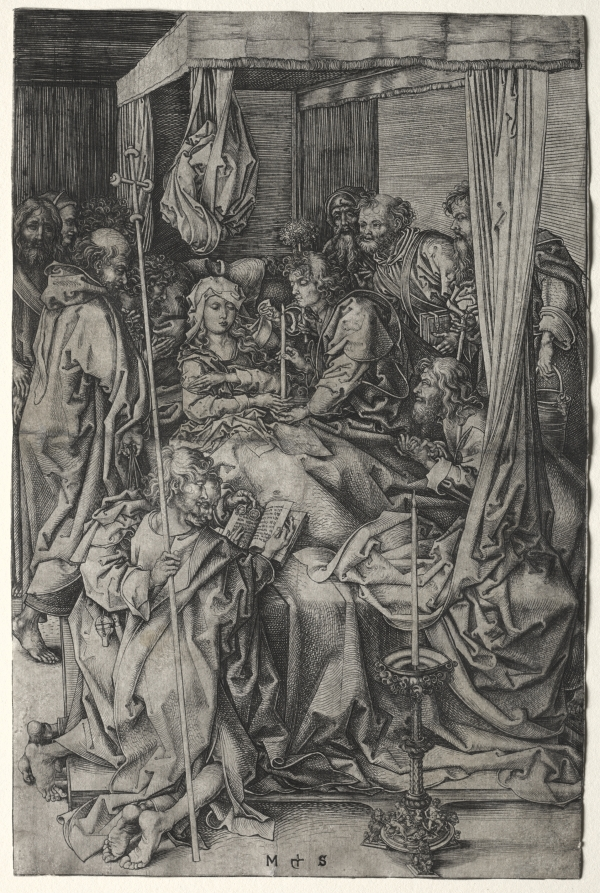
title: The Death of the Virgin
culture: Germany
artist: Martin Schongauer (German, c. 1450–1491)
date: 1470–75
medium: engraving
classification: Print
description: According to the apocryphal Gospel by Pseudo-Matthew, the apostles were present at the Virgin Mary's death. Here, the apostles all gather around Mary's deathbed, as Christ's mother—shown as a young woman due to her immaculate state—is about to draw her last breath. Saint John supports the lighted candle that the Virgin can not longer hold by herself. Other apostles perform the last rites for Mary and look at her with sorrow and concern. This print belongs to a set of four engravings considered to be an incomplete series of episodes of the Life of the Virgin, which also includes The Nativity (1939.448), The Adoration of the Magi (1942.1070), and The Flight into Egypt (1954.260).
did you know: The attentive rendering of the candlestick at the foot of Mary's bed testifies to Schongauer's familiarity with metalworking.